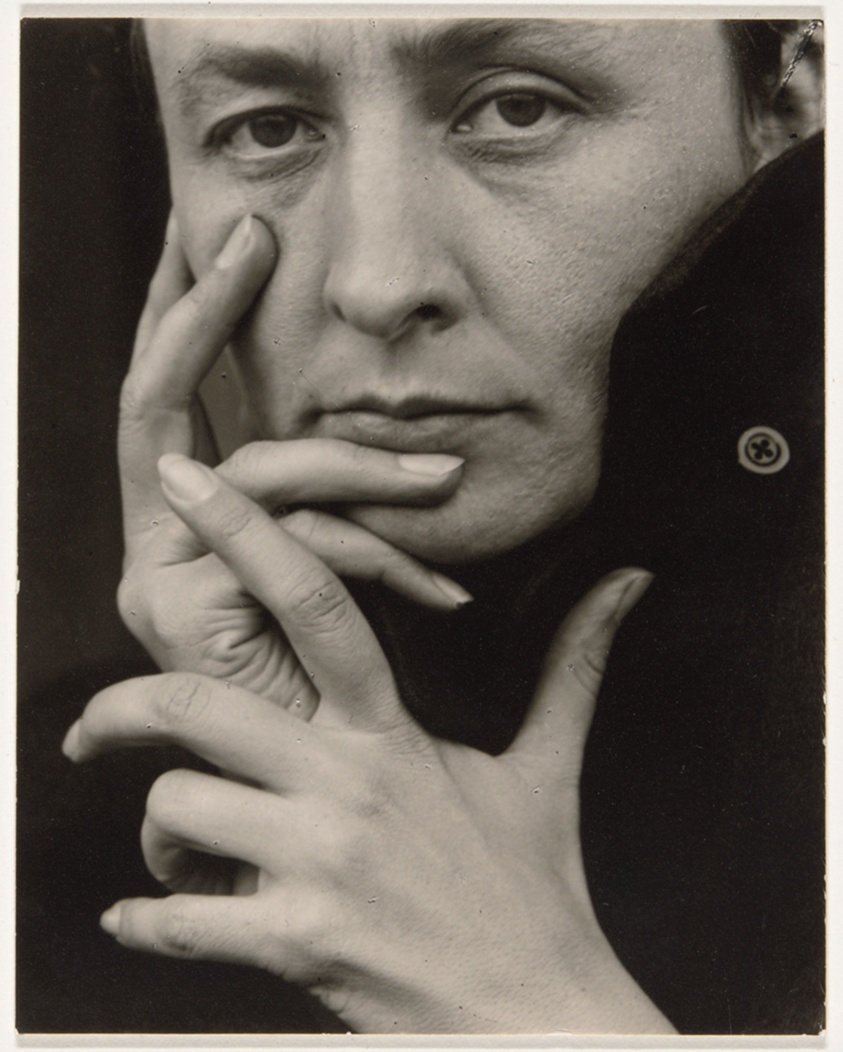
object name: Photograph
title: Georgia O'Keeffe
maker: Alfred Stieglitz (American, 1864–1946)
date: 1918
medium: Gelatin silver print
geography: United States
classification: gelatin silver (developing-out-paper) pr; photographic process; photography; photograph